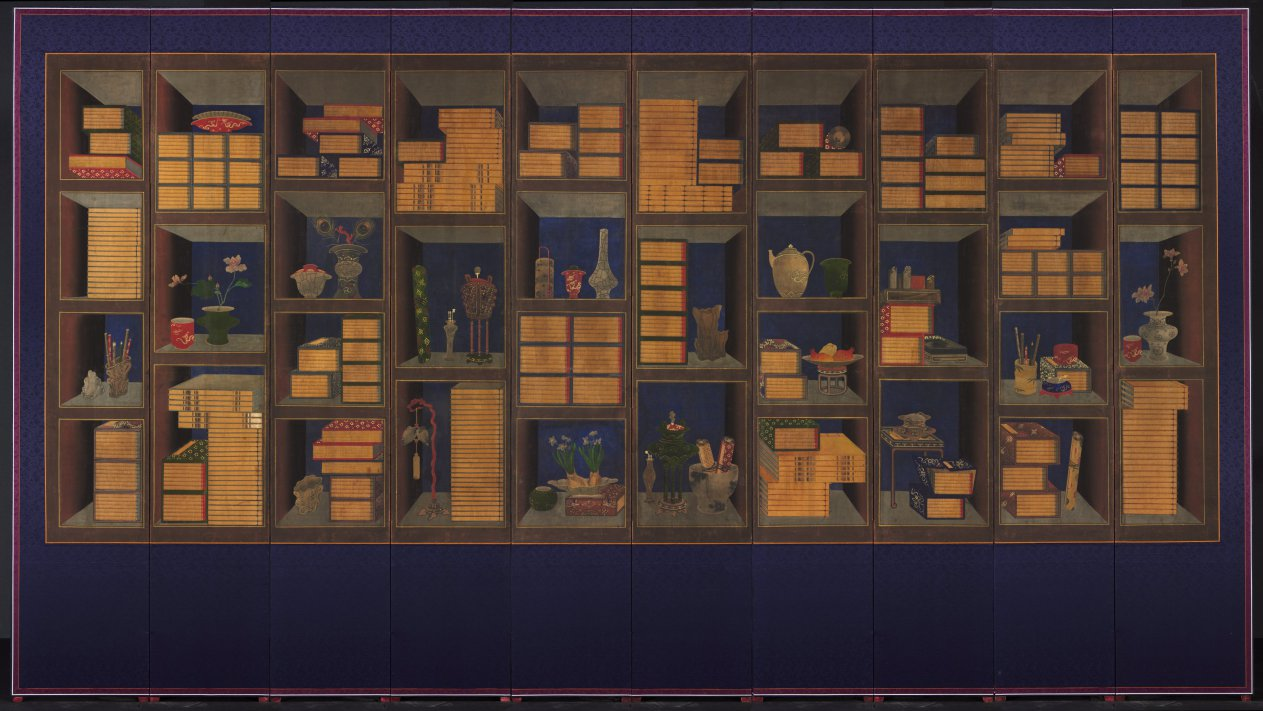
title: Books and Scholars’ Accoutrements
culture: Korea, Joseon dynasty (1392–1910)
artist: Yi Taek-gyun (Korean, 1808–after 1883)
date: late 1800s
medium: ten-panel folding screen; ink and color on silk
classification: Painting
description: First produced around the second half of the eighteenth century, chaekgado (literally, “pictures of bookshelves”) flourished throughout the 1800s as a royal emblem. And soon this pictorial genre became a popular furnishing item for aristocrats' elegant studies. The third panel from the right bears a hidden seal that reveals the artist: Yi Taek-gyun, a prominent court artist active in the late 1800s.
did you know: A convincing hypothesis that connects the Korean chaekgado tradition with the Renaissance tradition of illusionistic studiolo through the technique of trompe-l'œil and Chinese Qing period treasured cabinet paintings was first made in Park Shim-eun's thesis (2002).